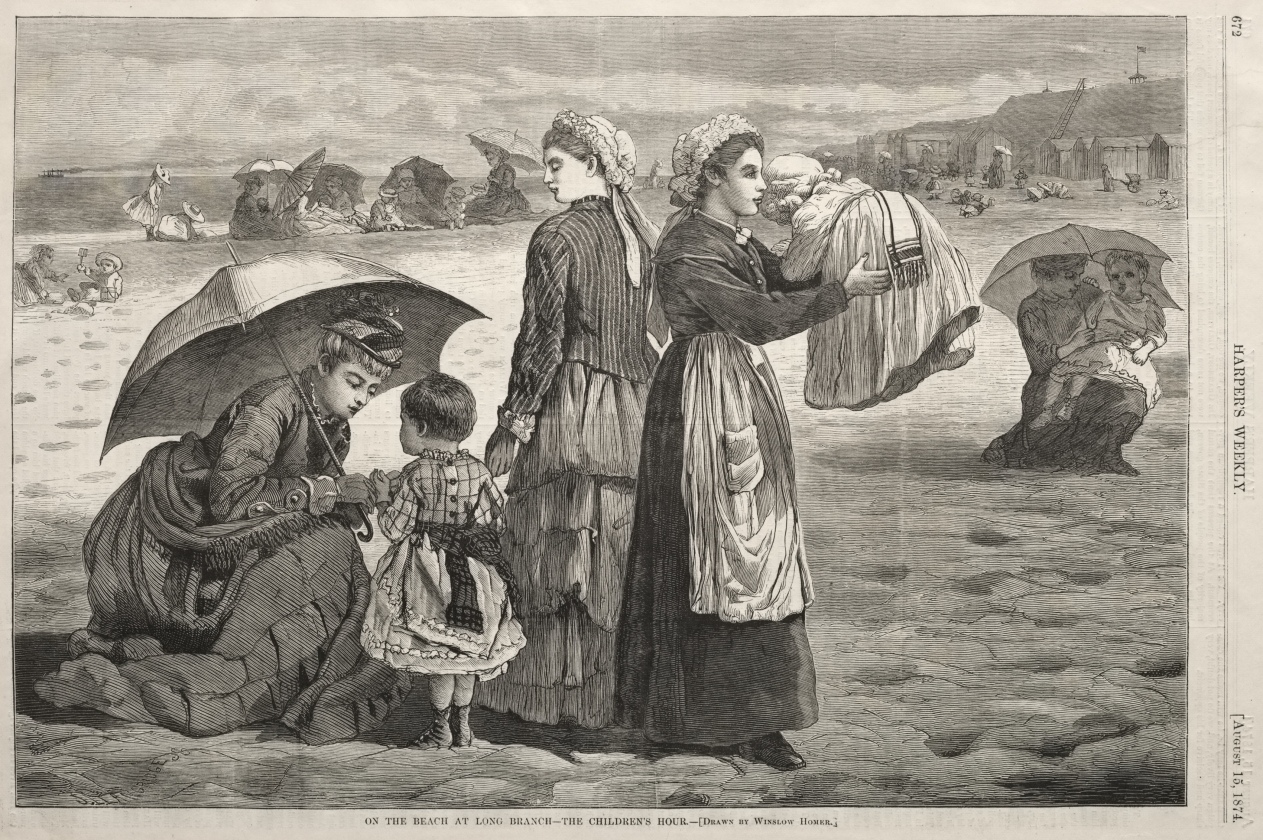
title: On the Beach at Long Branch - The Children's Hour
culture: America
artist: Winslow Homer (American, 1836–1910)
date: 1874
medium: wood engraving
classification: Print